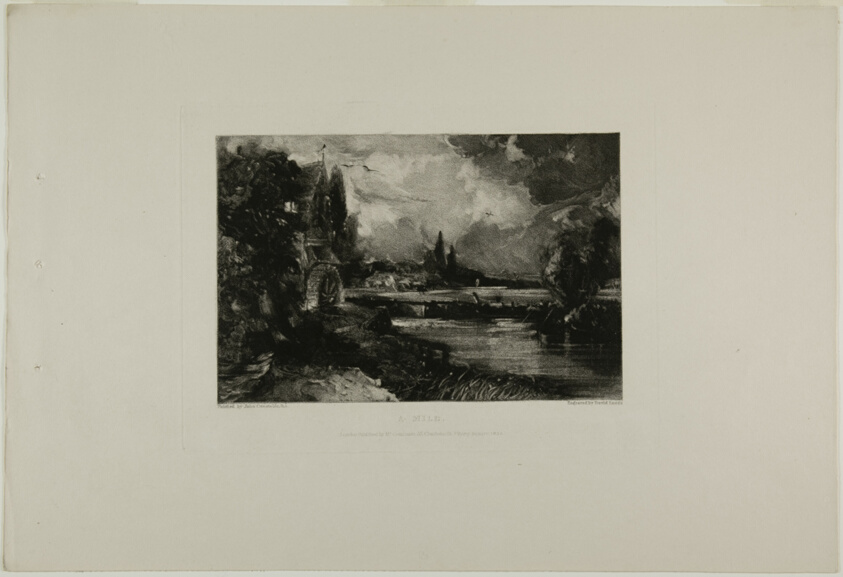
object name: Print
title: A Mill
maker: David Lucas (English, 1802-1881); after John Constable (English, 1776-1837)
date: 1830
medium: Mezzotint in black ink on heavy ivory wove paper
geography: England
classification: mezzotint; print; prints and drawing